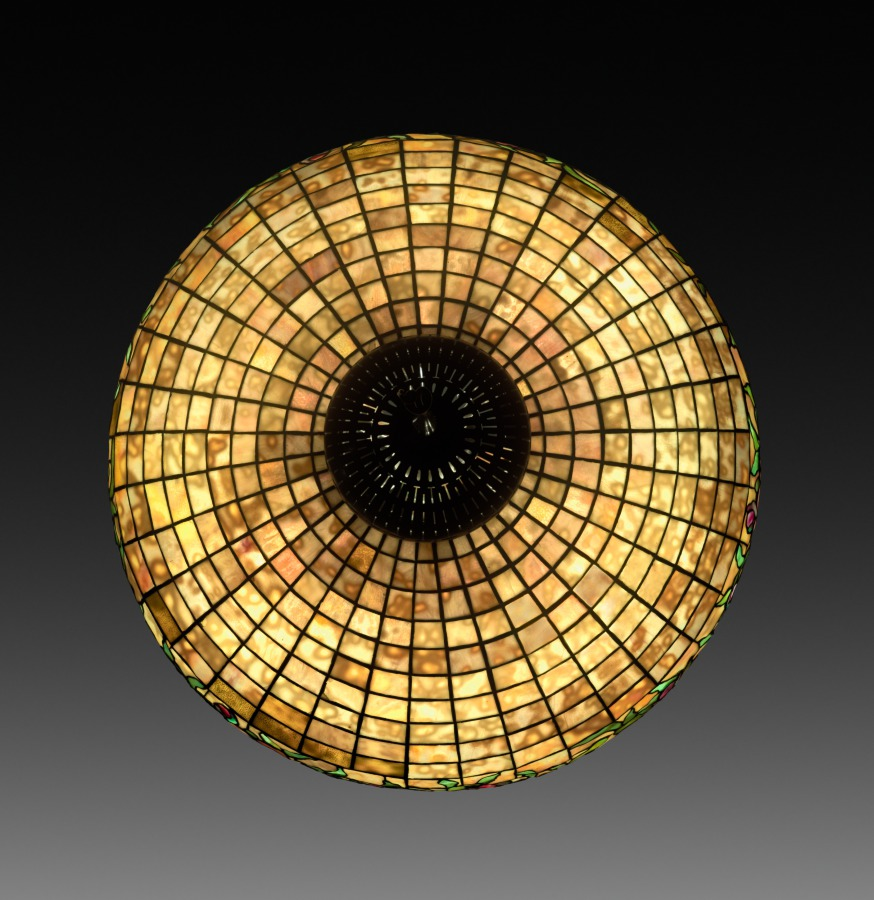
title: Peony Border Floor Lamp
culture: America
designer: probably by Clara Wolcott Driscoll (American, 1861–1944)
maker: Tiffany Studios (United States, New York, 1902–32)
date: c. 1905–10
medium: leaded glass, bronze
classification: Lamp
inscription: Shade impressed: TIFFANY STUDIOS NEW YORK 1574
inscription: Base impressed: TIFFANY STUDIOS/NEW YORK/376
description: In the 1870s a renewed emphasis on natural landscapes ushered in a generation of cottage gardeners who delighted in planting perennials in large quantities. Louis Comfort Tiffany was among those who championed the lush, sometimes wild-looking displays of varied floral species in the garden at his Long Island estate, Laurelton Hall. Tiffany encouraged his designers to take inspiration from his garden by shipping fresh cuttings almost weekly to his studios. Ohio native Clara Wolcott Driscoll and her team of female designers created floral patterns for lamps and mosaics based on the colorful blooms of spring that became among the most sought after and commercially successful of Tiffany’s production.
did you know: Standing floor models of this size were among the most expensive of Louis Comfort Tiffany's lamps.